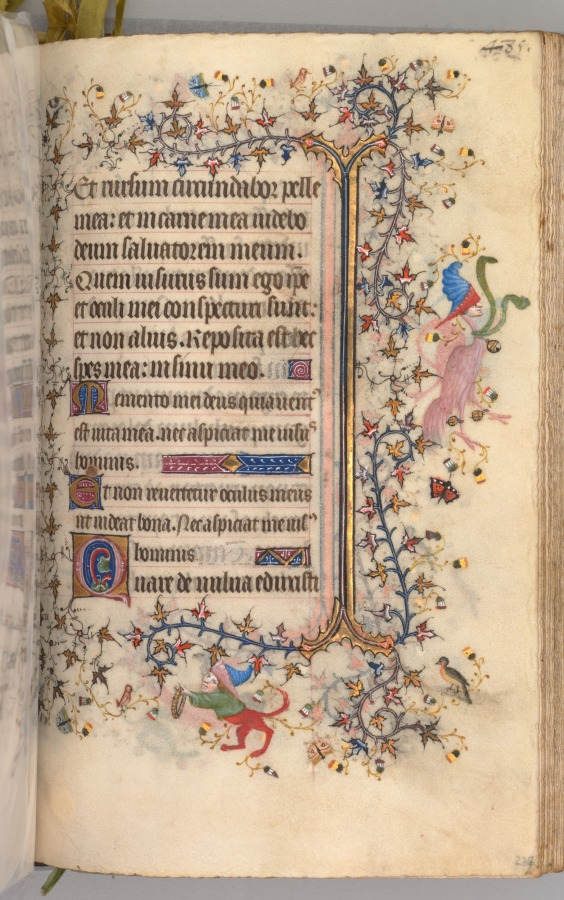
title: Hours of Charles the Noble, King of Navarre (1361-1425): fol. 237r, Text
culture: France, Paris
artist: Master of the Brussels Initials and Associates (French)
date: c. 1405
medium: ink, tempera, and gold on vellum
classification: Bound Volume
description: This precious volume was obviously highly prized by its owner, the French-born King of Navarre, who had his coat of arms painted on no less than twenty folios. Rather than directly commissioning this manuscript from a specific workshop, it seems that Charles the Noble acquired his book of hours -- perhaps ready-made for the luxury market -- while on a trip to Paris in 1404-05. A collaborative effort, six painting styles are evidenced within the pages of this codex, those of two Italians, two Frenchmen, and two Netherlanders. The painter who was responsible for the planning and decoration of the book, and who produced seventeen of the large miniatures, was a Bolognese artist known as the Master of the Brussels Initials. His principal assistant, responsible for most of the borders, was a Florentine who signed his name "Zecho" da Firenze on folio 208 verso.